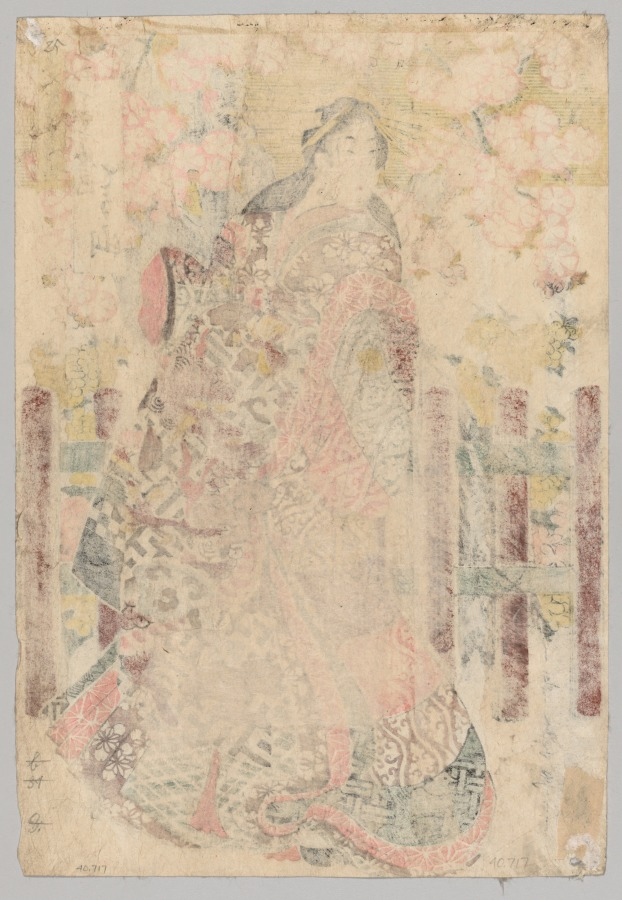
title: Chōzan of Chōjiya from the series Triptych of Beauties Before Blinds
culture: Japan, Edo period (1615–1868)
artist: Kitagawa Utamaro (Japanese, c. 1754–1806)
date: 1753–1806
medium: color woodblock print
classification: Print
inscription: Signature: Utamaro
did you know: The yellow title cartouche at the upper right of this print lets us know it was part of a triptych.